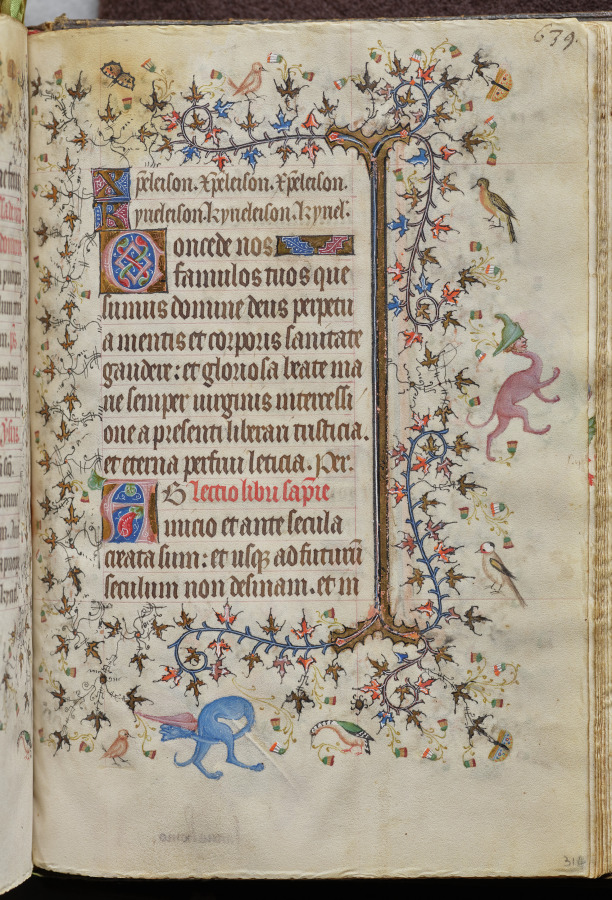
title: Hours of Charles the Noble, King of Navarre (1361-1425), fol. 314r, Text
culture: France, Paris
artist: Master of the Brussels Initials and Associates (French)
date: c. 1405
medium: ink, tempera, and gold on vellum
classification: Bound Volume